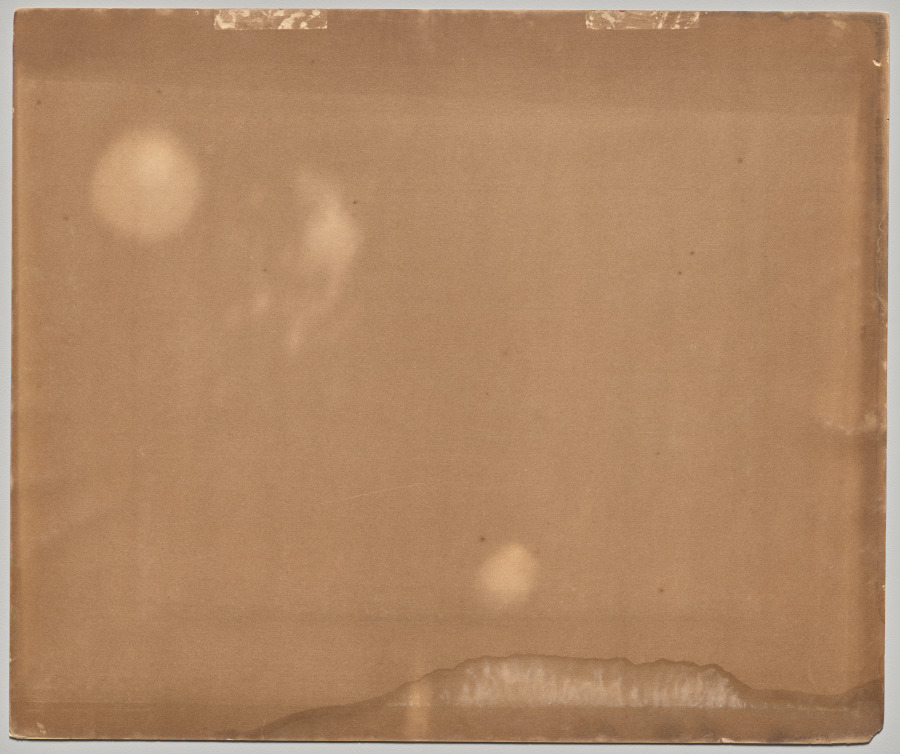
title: Venice in Moonlight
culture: Italy, 19th century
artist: Carlo Naya (Italian, 1816–1882)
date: 1870s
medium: albumen print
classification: Photograph